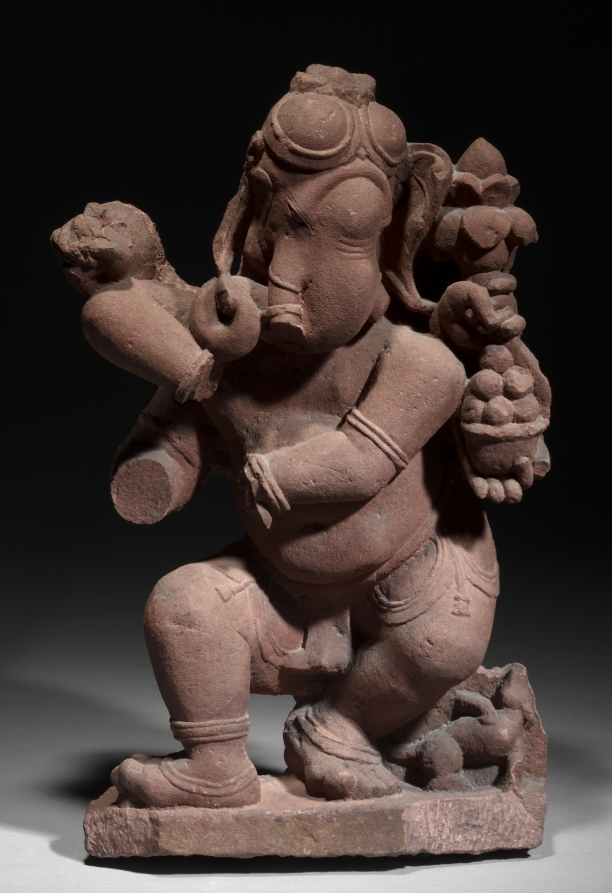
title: Dancing Ganesha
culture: Central India, Madhya Pradesh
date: c. 1000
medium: sandstone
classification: Sculpture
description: The name Ganesha means "lord (isha) of the demonic dwarfs (gana)," part of Shiva's entourage. They dance and imitate Shiva in humorous ways that inspire his followers' affection. In this sculpture Ganesha's dance mimics the dance of Shiva. Ganesha has six arms instead of four, and he holds a bowl of sweet cakes and a radish instead of a tongue of flame.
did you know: Ganesha's mount is the rat, which evokes full granaries and the prosperity and abundance that they imply.